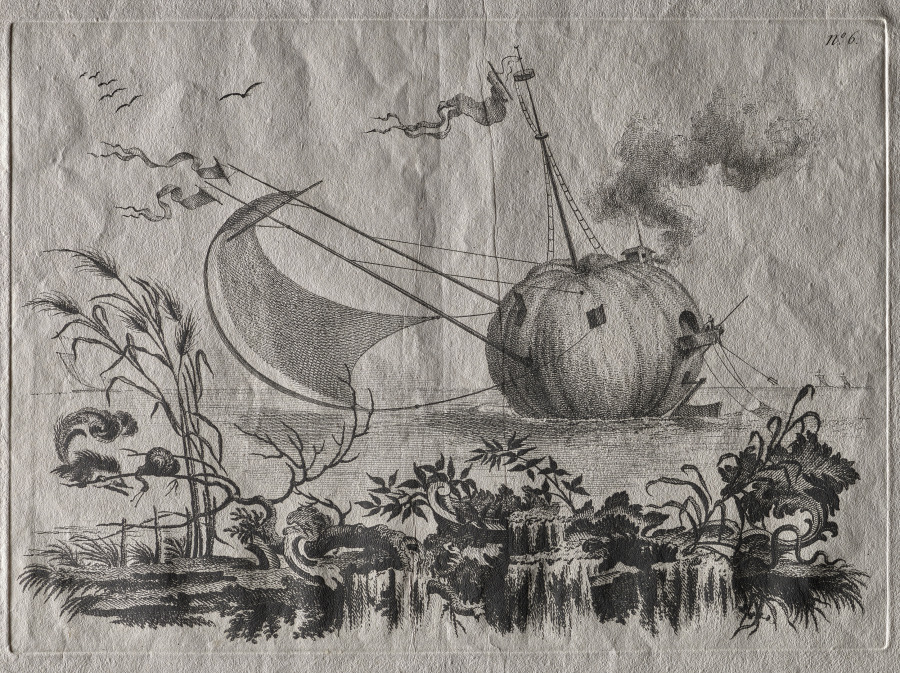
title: A Pumpkin Used as a Fishing Boat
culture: Italy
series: Suite of the Most Notable Things Seen by John Wilkins Erudite English Bishop during His Famous Voyage from the Earth to the Moon … dedicated to Sir William Hamilton ambassador to the Court of Naples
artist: Filippo Morghen (Italian, 1730–after 1807)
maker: possibly after Jean-Pierre-Louis-Laurent Hoüel (French, 1735–1813)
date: about 1769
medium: etching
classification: Print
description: Filippo Morghen’s set of 10 etchings is outstanding among visual narratives of imaginary voyages to the moon, both visual and literary, that intrigued 18th-century European audiences. A title page and nine plates depict the imagined lives and economy of moon dwellers. These include modes of transport such as large birds and sailboats propelled by giant bellows, enormous scissors for capturing wild beasts (including an oversized rat), and the use of giant pumpkins as fishing boats and as dwellings. Representations of the moon dwellers are based on inaccurate and imaginary European interpretations of Asian, Ottoman, and Native American cultures—called chinoiserie and turquerie—that permeated the decorative and visual arts of the period.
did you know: Morghen based this print series on three books dedicated to moon exploration, including Bishop Francis Godwin’s, Man in the Moone, 1640.